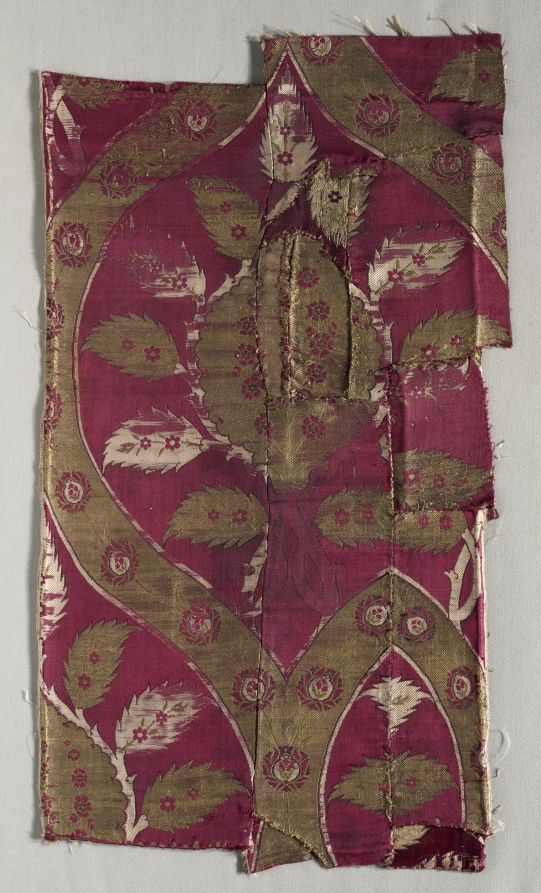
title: Textile Fragment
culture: Turkey, Bursa, 16th century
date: 16th century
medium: brocaded silk with metal thread weft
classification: Textile